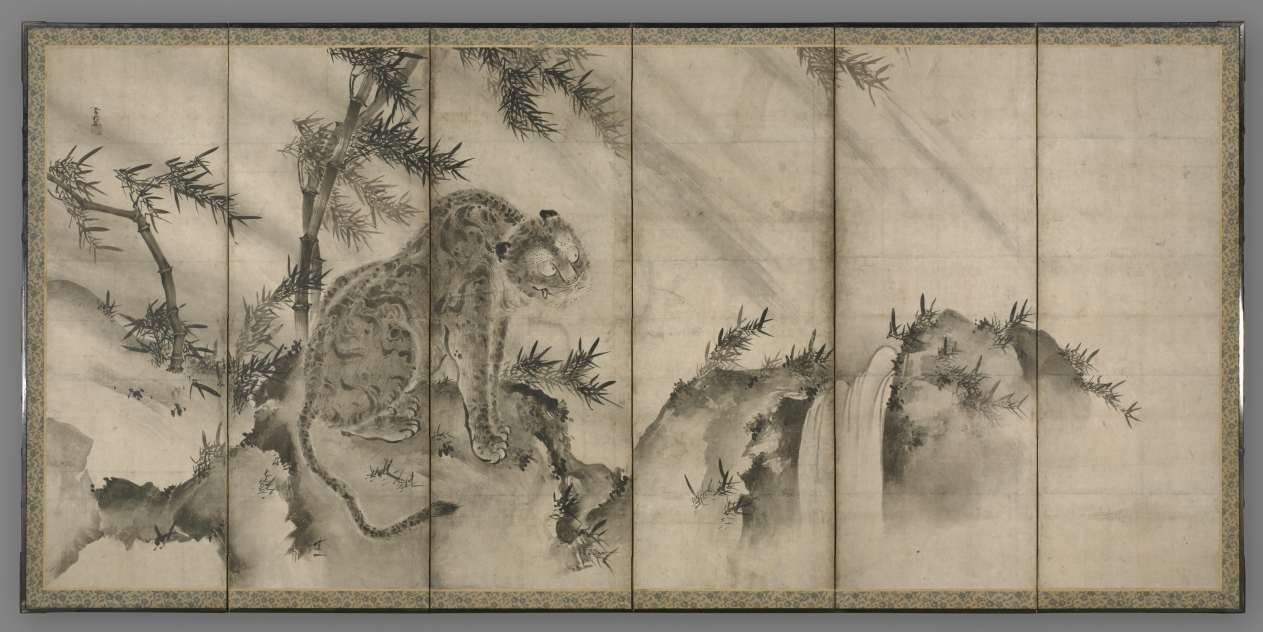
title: Dragon and Tiger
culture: Japan, Muromachi period (1392–1573) to Momoyama period (1573–1615)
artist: Sesson Shūkei (Japanese, c. 1492–c. 1577)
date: c. 1546–56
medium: One of a pair of six-panel folding screens; ink on paper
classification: Painting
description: In Chinese cosmology, the tiger's roar is said to produce wind. In Chinese paintings, the tiger is often shown with a dragon, who creates rain clouds. Together, they represent the balancing forces of the universe. Chinese presentations of the theme, often in hanging scroll format, provided the basic composition for the pair of screens to which this one belongs.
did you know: Although the theme of this painting derives from Chinese philosophy and pictorial culture, Sesson's tiger is likely modeled after Korean prototypes of the Joseon period circulating in Japan.